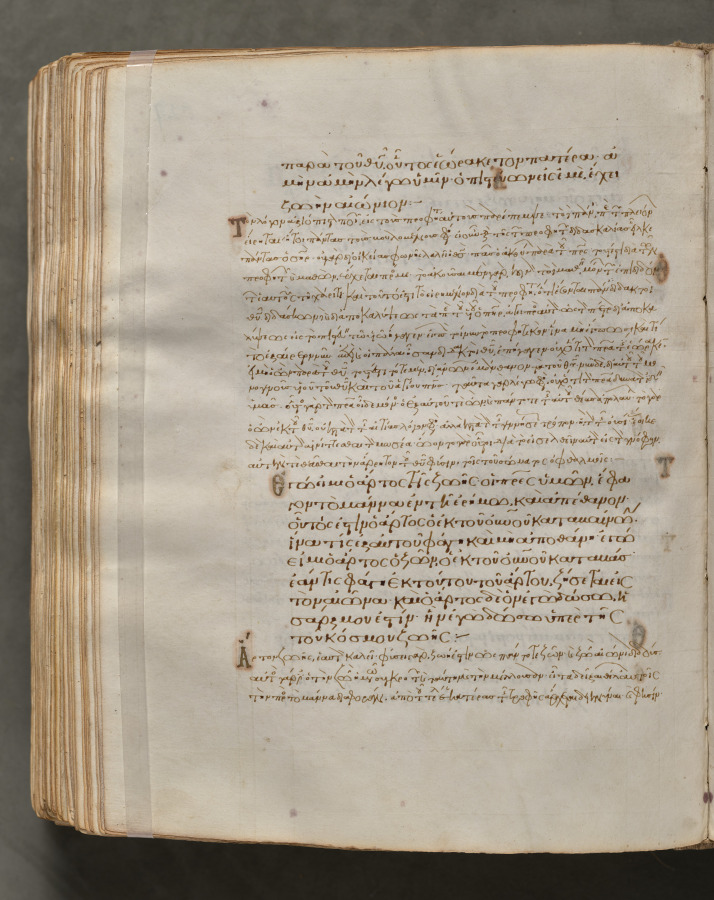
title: Text, folio 353 (verso), from a Gospel Book with Commentaries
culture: Byzantium, Constantinople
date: c. 1000–1100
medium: ink, tempera, and gold on vellum; leather binding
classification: Bound Volume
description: Each of the four gospels in this book opens on a page with brilliantly illuminated borders depicting the author of the text as well as birds—principally peacocks, symbols of the immortality of the soul—and fountains, representing the fountain of life and the salvation of the soul. This volume consists of 428 leaves with texts in Greek. Its level of sophistication suggests that it was probably written and decorated in a monastery in Constantinople.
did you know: Gospel books were carried in procession through Byzantine churches.